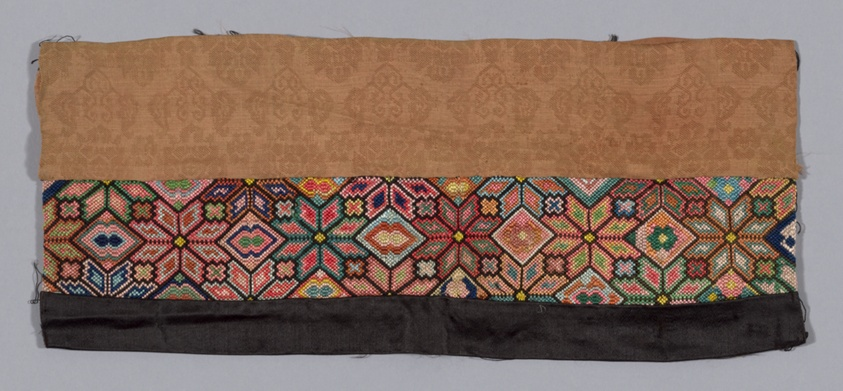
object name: Costume and Accessories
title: Band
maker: Han-Chinese (China)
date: Qing dynasty (1644–1911), 1875/1900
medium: Forty-four pairs and eight odd pieces of embroidered sleeve, ankle bands, etc. on gauze.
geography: China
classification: costume - embroidery; embroidery; costume